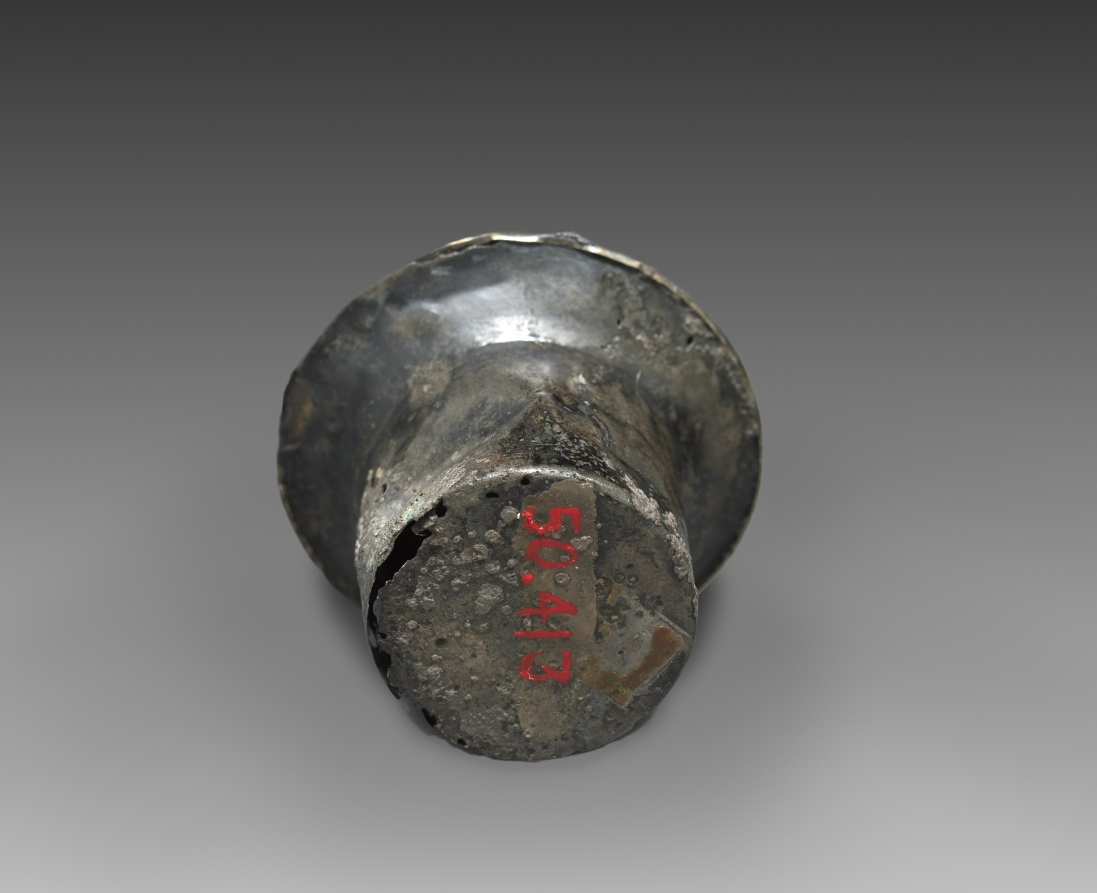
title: Ear Ornament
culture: Peru, North Coast, Sicán, 9th-14th Century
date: c. 800–1370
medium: hammered and embossed gold alloy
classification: Metalwork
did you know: Wearing large ear ornaments, a privilege of the nobility, permanently stretched the earlobes.